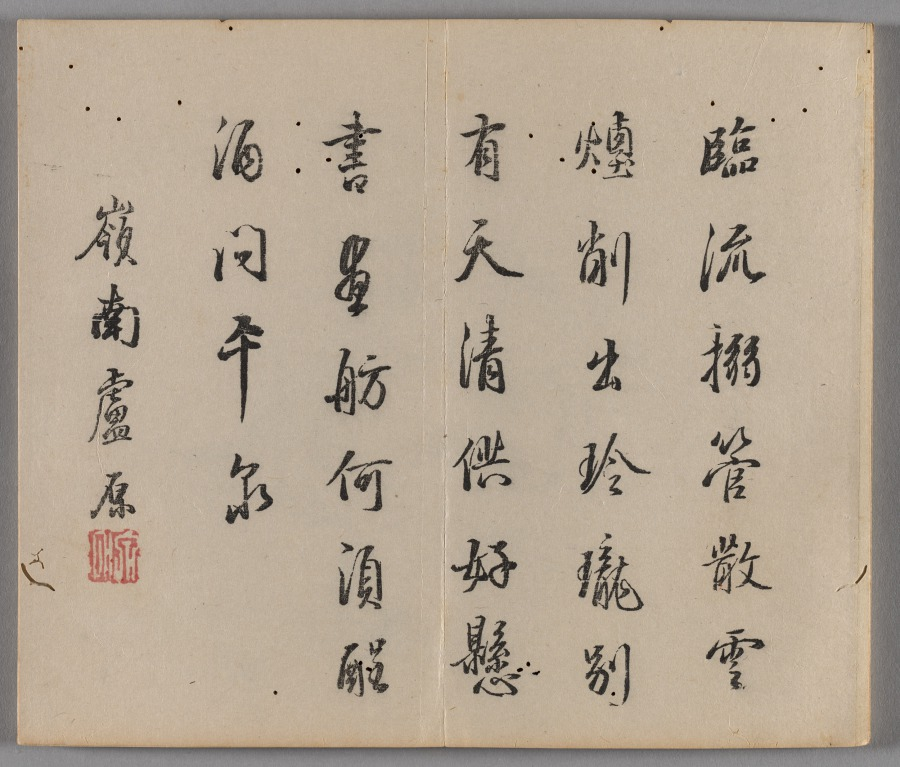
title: Ten Bamboo Studio Painting and Calligraphy Handbook (Shizhuzhai shuhua pu): Rocks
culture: China, Qing dynasty (1644-1911)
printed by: Hu Zhengyan (Chinese, c. 1584–1674)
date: 1633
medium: Woodblock-printed book; ink and colors on paper; first edition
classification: Print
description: Color printing reached a level of perfection in the early 1600s, as seen in this Ten Bamboo Studio Collection of Calligraphy and Painting and the Mustard Seed Garden Manual of Painting (printed 1679 and 1701). The painterly quality, precision in registering (aligning) the woodblocks, and harmonious colors made them the most successful color print editions in Chinese history. Both editions were printed and compiled in Nanjing, spread nationwide, and had a great impact on the arts in Japan and Korea.